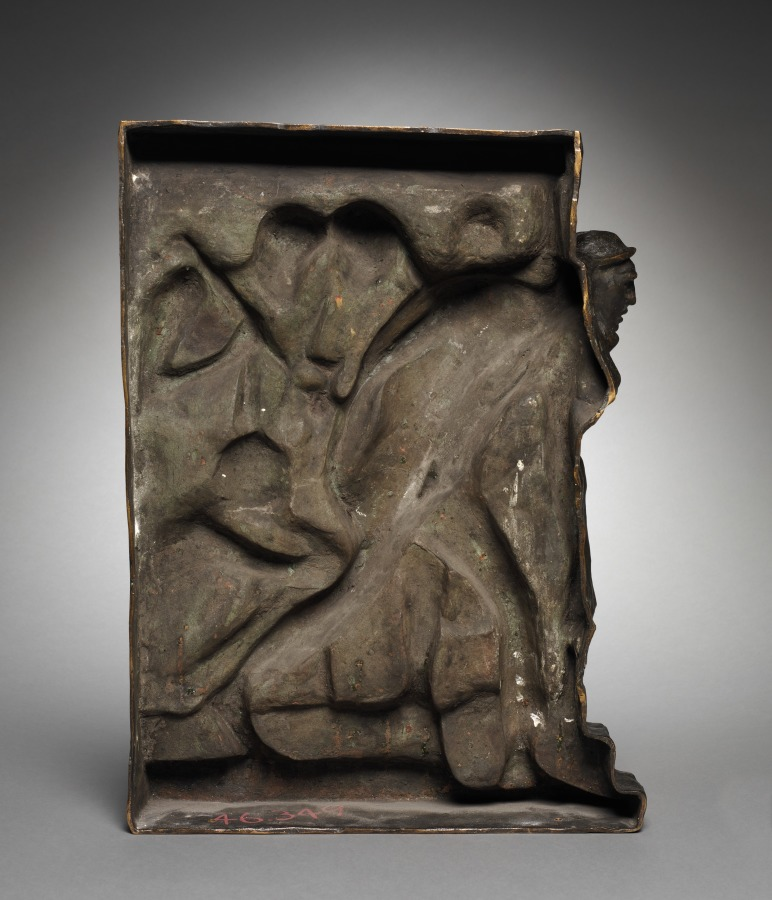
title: The Furnace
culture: Belgium, 19th century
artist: Constantin Meunier (Belgian, 1831–1905)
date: c. 1890 – 1900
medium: bronze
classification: Sculpture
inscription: Signed lower right side: "C. Meunier"; inscribed lower right: "B. Verbeyot, Fondeur, Bruxelles."